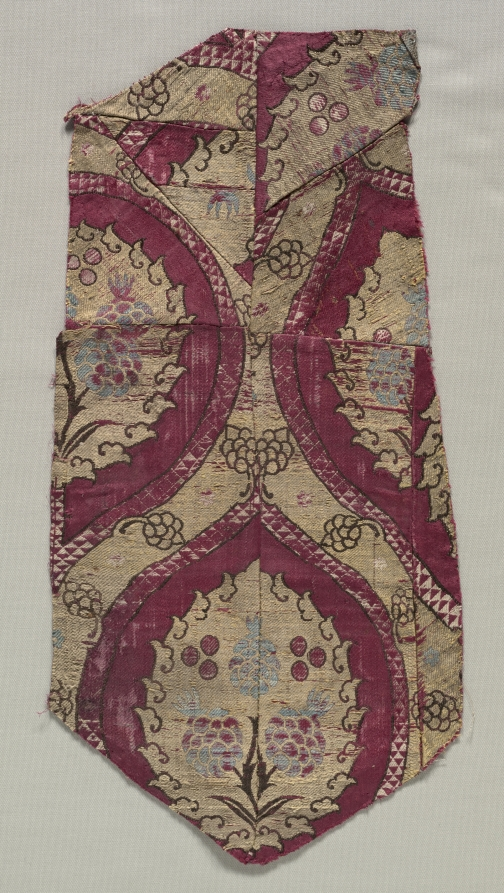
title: Textile Fragment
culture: Turkey, 16th century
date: 16th century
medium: brocaded silk with metal thread weft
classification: Textile